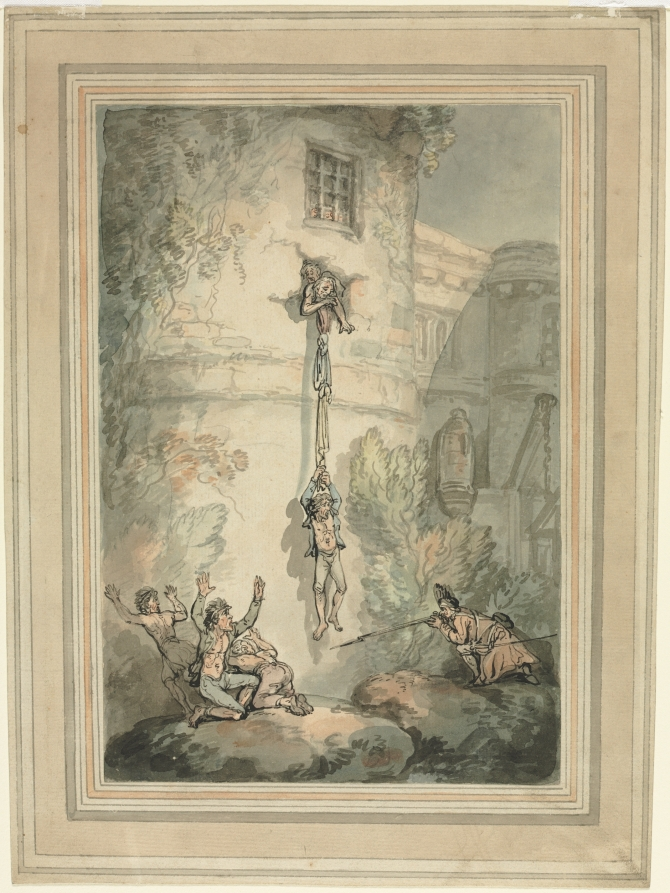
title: Escape of French Prisoners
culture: England, 18th century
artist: Thomas Rowlandson (British, 1756–1827)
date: c. 1776–1827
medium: pen and Ink and watercolor wash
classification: Drawing